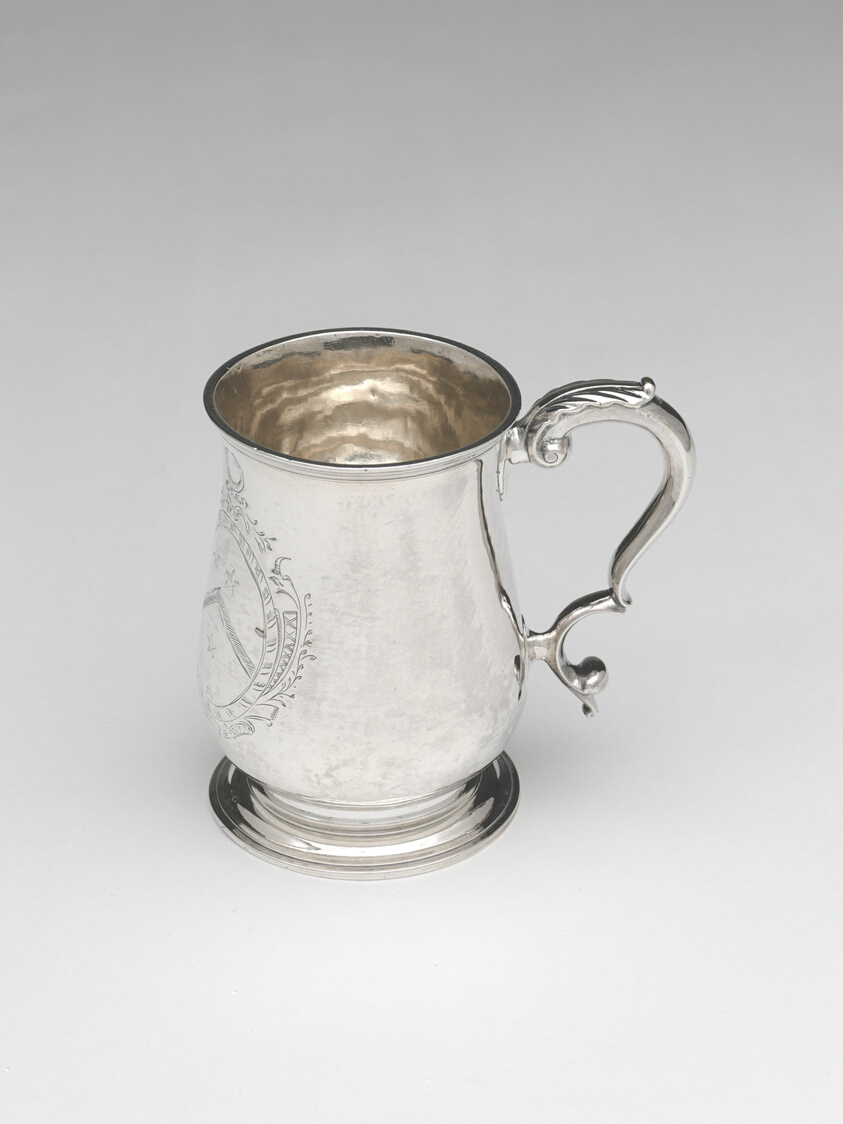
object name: Metalwork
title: Cann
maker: Benjamin Burt; American, 1729–1805; Boston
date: c. 1765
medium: Silver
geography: Boston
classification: drinking vessel; silver; american decorative arts; american arts; decorative arts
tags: dining, drinking